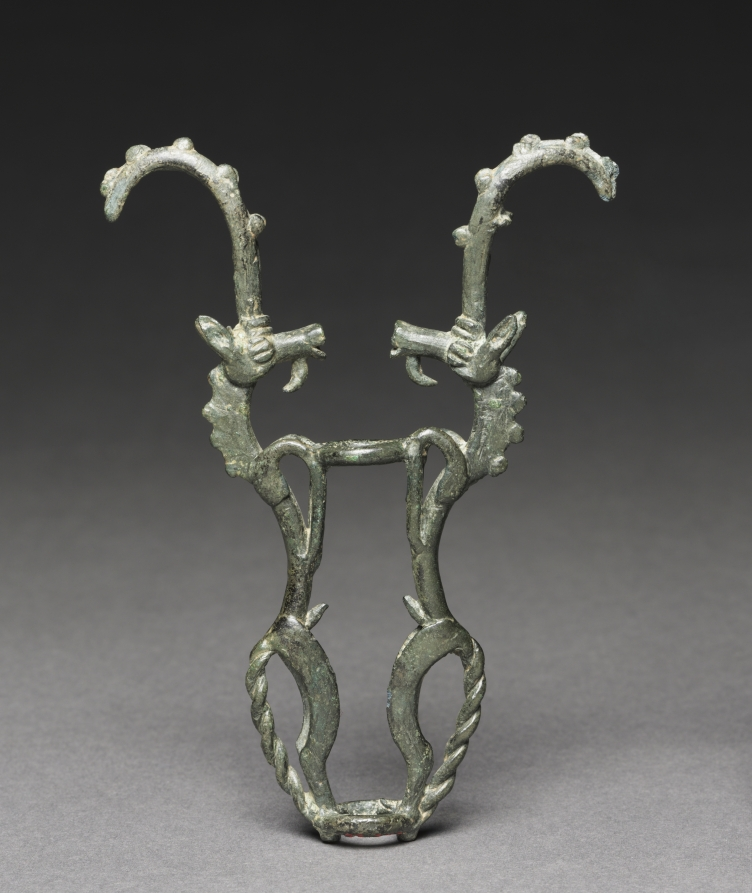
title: Ibex Standard Finial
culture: Iran, Luristan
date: c. 700–600 BCE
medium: bronze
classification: Sculpture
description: This standard finial, a decorative tube perhaps used as a military emblem, is made of two abstracted ibexes. Their elongated forelegs form a ring where a pole may have once been inserted. An additional horizontal bar extends from their chests to support the ring. The cast bronze ibexes are decorated with ridged horns, curled beards, and twisted tails. Their hind legs join another ring. This standard is likely from Luristan, home to a seminomadic people who created a strong metalworking industry in the Iron Age.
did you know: Ibexes are wild goats from the Zagros Mountains of Iran and the Caucasus.